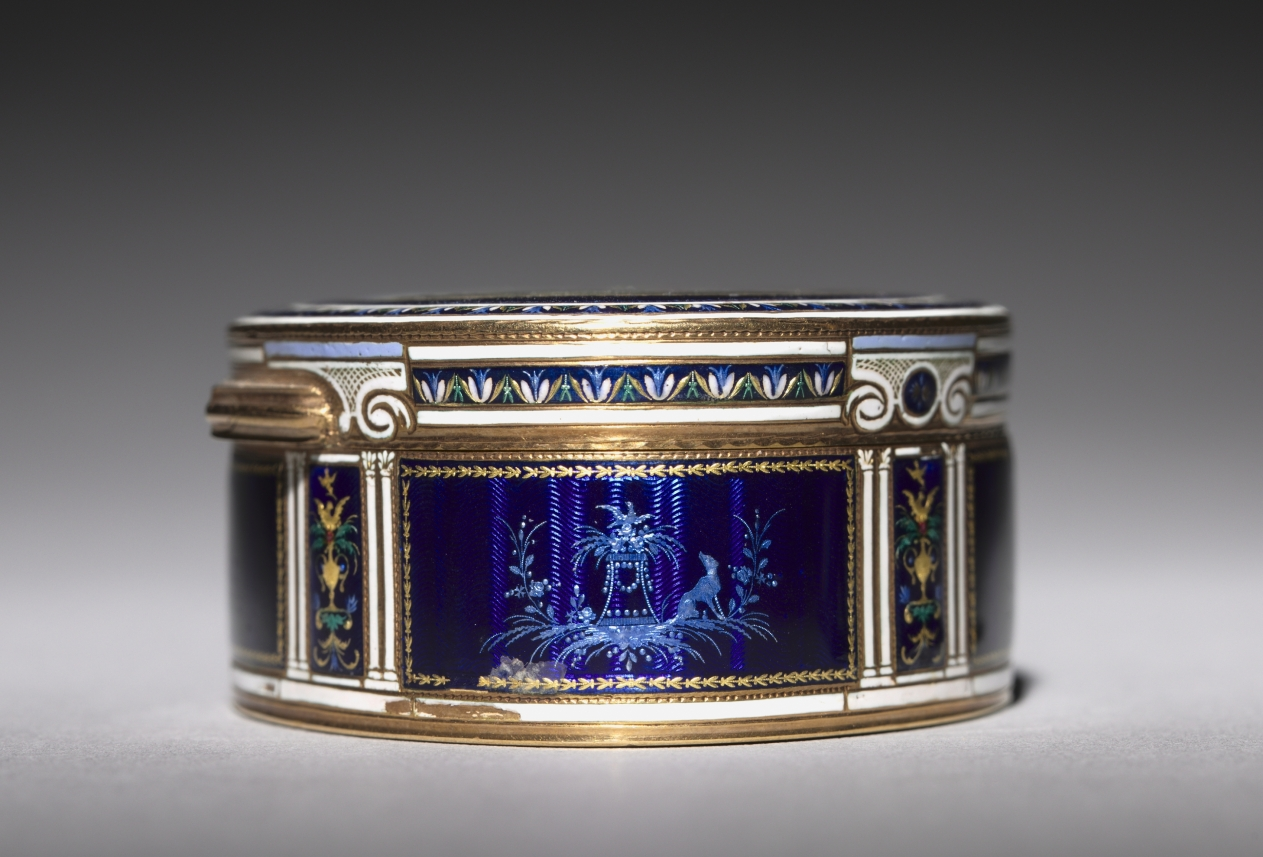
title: Box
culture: Switzerland, Geneva, late 18th Century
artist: Georges Rémond et Cie (Swiss)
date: late 1700s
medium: gold and enamel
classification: Enamel